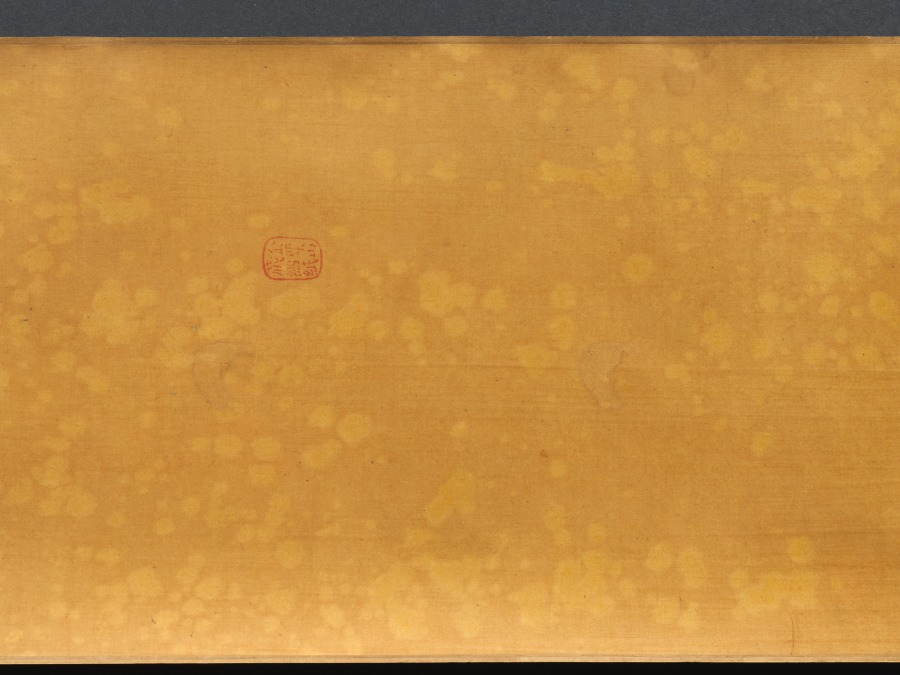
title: Flowers of Four Seasons, with Poems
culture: China, Ming dynasty (1368–1644)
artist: Wang Guxiang (Chinese, 1501–1568)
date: 1531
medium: handscroll; ink and light color on silk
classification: Painting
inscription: Artist's inscription, signature, and 15 seals. Ink Orchids. Sewn as pendants for the man of worth, swaying quiety, fragrance in the valley. [seal] Hsiao-chu ts'un Peony. Wiping his face, the young gentleman Ho [Ho Yen of Wei, Three Kingdoms] appears to have been powdered. His previous life was the perfume-stealing Han Shou [of Chin, 265–419 CE], the fragrance still lingers. [seal] Ts'un-wu chai. Flowering Crab Apple, New Bamboo. Shao-lin [Du Fu, 712–770] had to put down his brush. [Flowering Crab Apple]. Yü-k'o [Wen T'ung, d. 1079) in vain wrote poems about [Bamboo]. [seal] Yu-shih. Lotus Flowers. When she turns her head, half-hidden by a fan, and casts a glance, all the beautiful women become colorless. [seal] K'ang yüeh huai. Loquat. Ripeness in summer. [seal] Lu-chih. Pomegranate Flower. Whenever I remember you I will send my thoughts, but where have you gone--the [skirt] of pomegranate red? [seal] Wu-ho Sheng. Day Lily. Plant the day lily to forget sorrow. [seal] Yu-shih. Chrysanthemum. The untrammelled joy at the eastern fence. [seal] Lu-chih. Begonia. Comparing it to the beauties of Spring, and spreading them out as trimming for the stone steps. [seal] Yu-shih. Hibiscus. In recent years I have always enjoyed looking at flowers; instead of dark red I preferred pink ones. [seal] Jen-sheng i-lou. Narcissus, Camellia. The jade girdle left behind at Lo River. [Narcissus]. The precious pearls glitter before Spring. [Camellia]. [seal] Lu-chih. Heavenly Bamboo (Nandina domestica). A single branch in the wintry season. [seal] K'ang yüeh huai. Plum. Fragrant snow in the Lo-fou Mountains. [seal] Ts'un-wu chai. In the eleventh lunar month of the hsin-mao year of the Jiaqing era [1531], [I] imitated the boneless style of Yüan masters in sketching from life. Guxiang [seals] Yu-shih; Lu-chih. Translated by Wai-kam Ho/Lingyun Shih Liu (1980)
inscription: 2 colophons and 23 additional seals: 1 colophon dated 1632, and 2 seals of Li Jih-hua [Li Rihua] 李日華 (1565–1635); 1 colophon and 2 seals of Xiang Shengmo 項聖謨 (1597–1658); 3 seals of Liang Qingbiao 梁清標 (1620–1691); 6 seals of the Jiaqing 嘉慶 emperor (r. 1796–1820); 9 seals of Ch'eng Ch'i [Cheng Qi] 程琦 (1911–1988)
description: In this painting, flowers are loosely arranged by the seasons: narcissus and peony represent early spring; yellow loquat and lotus, summer; chrysanthemum, autumn; and the plum and evergreen bamboo, winter. The artist added to each flower a poetic line of calligraphy associating each plant with a historic or legendary figure. For example, the chrysanthemum, along with the line “The untrammeled joy at the eastern fence,” refers to the poet Tao Yuanming (died AD 427) who enjoyed chrysanthemums at the eastern fence in his garden. The scroll illustrates Wang Guxiang’s mastery of free brushwork, combining light monochrome ink with transparent colors. In his inscription, Wang says he used the “boneless” style without outlines as developed during the Yuan dynasty (1279–1368). Wang was a native of Changzhou, a city in southeast China known for its rich flora and fauna, and flower-and-bird painting tradition.